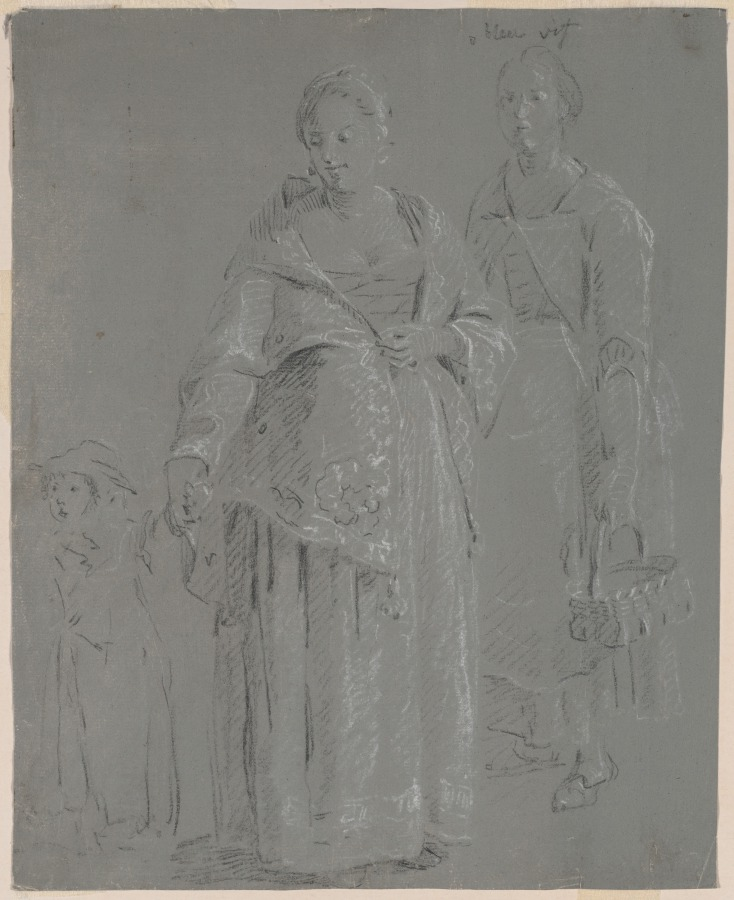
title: Three Figures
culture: France, 18th century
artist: Pierre-Jacques Volaire (French, 1729–1802)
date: 18th century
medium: black and white chalk on blue-gray prepared paper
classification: Drawing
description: Volaire’s sketch of two women with a child is an example of the numerous figure studies he executed on blue-gray prepared paper with black and white chalk. This drawing likely did not relate to a later painting, but instead seems to have been produced as a visual record of the artist’s creative experimentation.